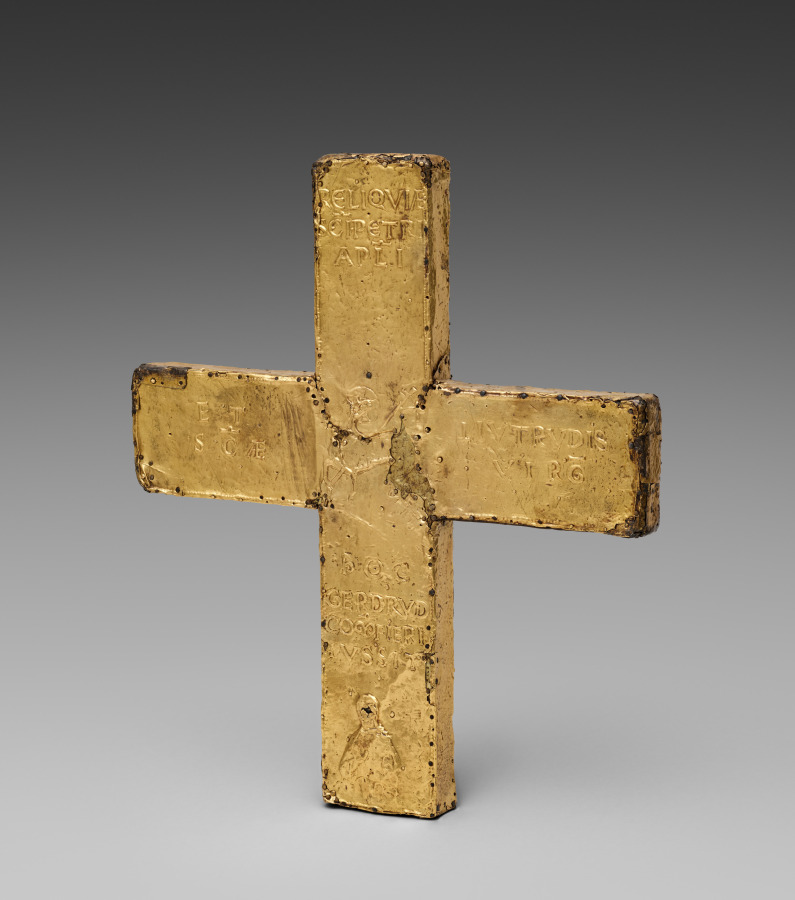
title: Ceremonial Cross of Countess Gertrude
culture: Germany, Lower Saxony?, 11th century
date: 1038 or shortly after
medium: gold: worked in repoussé; cloisonné enamel, intaglio gems, pearls, wood core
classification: Metalwork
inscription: translation of inscription on back: For the Relics of the Holy Apostle Peter and the Holy Virgin Liutrudis, Countess Gertrude Ordered this made.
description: This precious gold cross was commissioned by Countess Gertrude (died 1077) and given to the church of Saint Blaise following the death of her husband, Count Liudolf of Brunswick (died 1038). The cross was intended to be carried in liturgical processions or to be placed on a church altar. The inclusion of relics within the crosses endowed them with an additional role as devotional objects. At the center of the four cross arms, fine but much damaged cloisonné enamel plaques represent the symbols of the four Evangelists--an eagle for Saint John (above); a lion for Saint Mark (on the left); an ox for Saint Luke (on the right); and an angel for Saint Matthew (below). Pearls and precious and semiprecious stones are set within an intricate network of gold filigree while a large sapphire, inscribed in a circle and likewise surrounded by pearls and precious stones, is placed at the crossing.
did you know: Countess Gertrude's name appears on the back of the cross at the bottom.